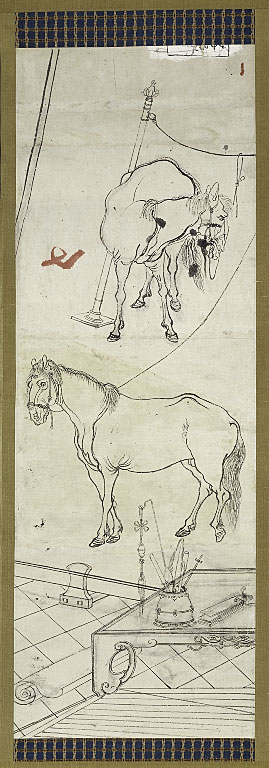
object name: Painting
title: Two Horses in Chinese Style, one of six sketches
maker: Kawanabe Kyosai; Japanese, 1831-1889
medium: Hanging scroll; ink on paper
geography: Japan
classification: hanging scroll; painting; asian art